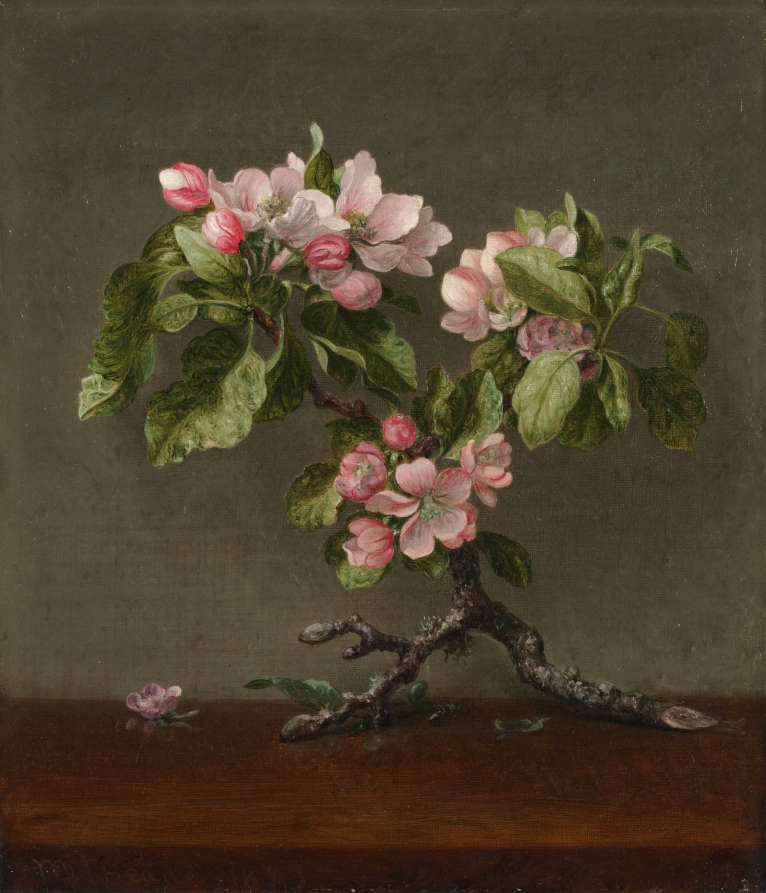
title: Apple Blossoms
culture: America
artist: Martin Johnson Heade (American, 1819–1904)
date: 1873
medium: oil on canvas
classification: Painting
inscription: signed lower left: MJ Heade 1873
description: Martin Johnson Heade painted approximately 150 floral still life compositions during his long career. In this relatively stark example, a single branch of apple blossoms is propped on a tabletop and supported by an undecorated wall.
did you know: The artist was very fond of flowers and took pleasure in gathering and arranging bouquets, especially for his breakfast table.